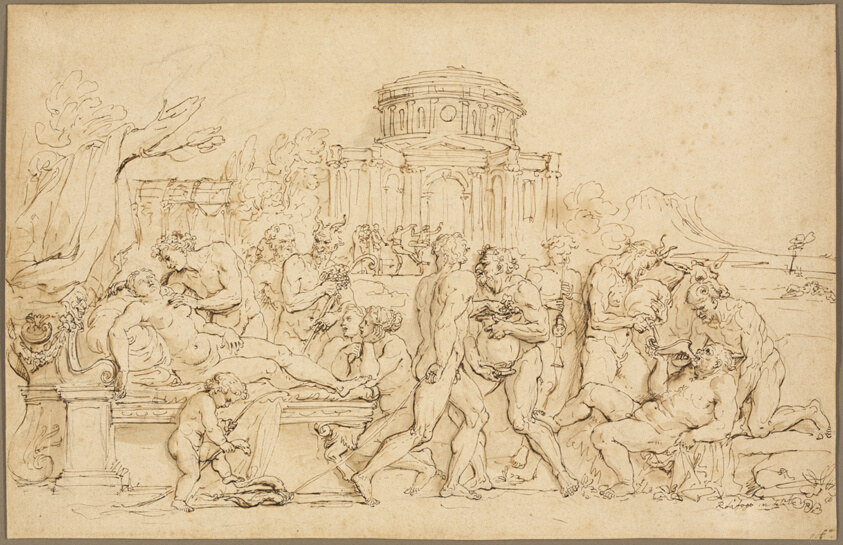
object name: Drawing and Watercolor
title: Bacchus and Ariadne, with Silenus, Nymphs and Satyrs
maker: Raymond de Lafage (French, 1656-1690)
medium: Pen and brown ink, with brush and brown wash, over black chalk, on buff laid paper, laid down on cream laid paper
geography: France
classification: pen and ink drawings; drawings (visual works); prints and drawing